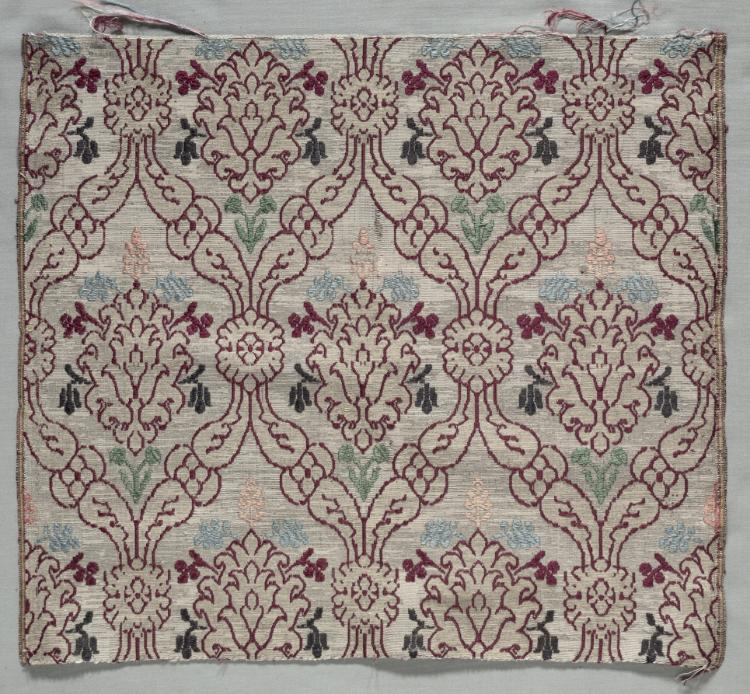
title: Brocaded Textile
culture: Italy, 16th century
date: 1500s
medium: brocade; silk and metal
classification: Textile